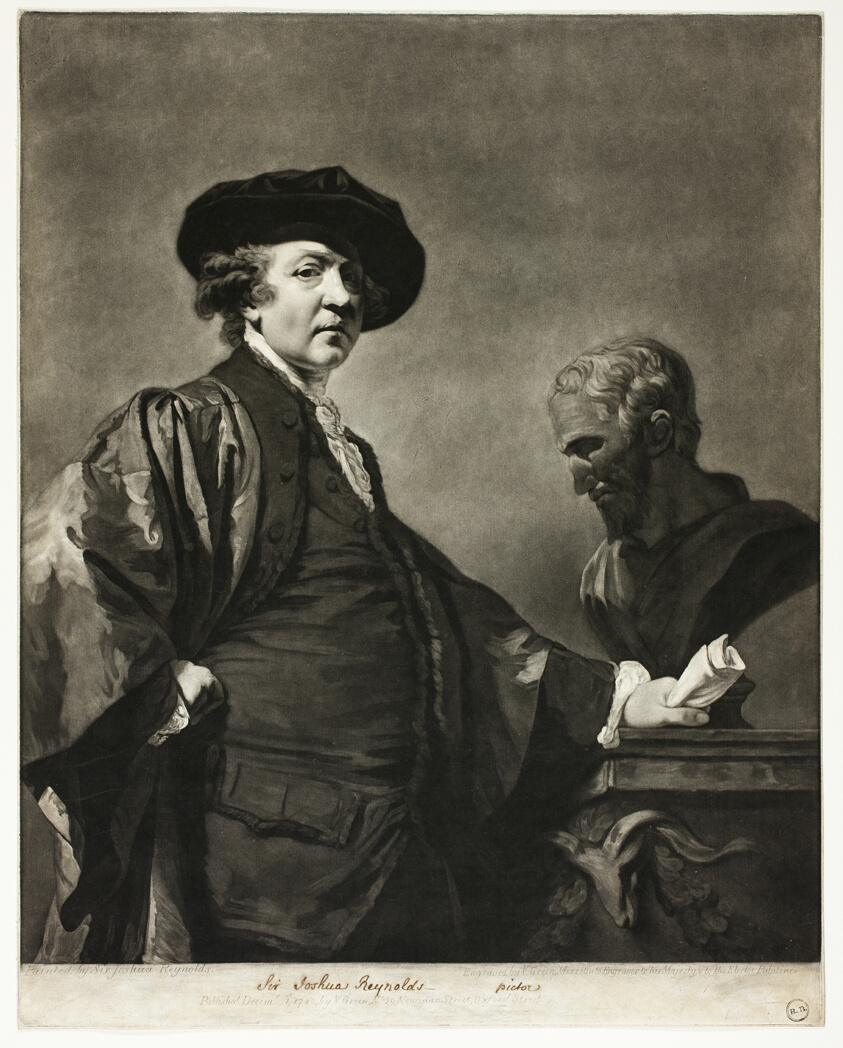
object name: Print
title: Sir Joshua Reynolds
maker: Valentine Green (English, 1739-1813); after Sir Joshua Reynolds (English, 1723-1792)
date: 1780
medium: Mezzotint on paper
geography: England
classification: mezzotint; print; prints and drawing